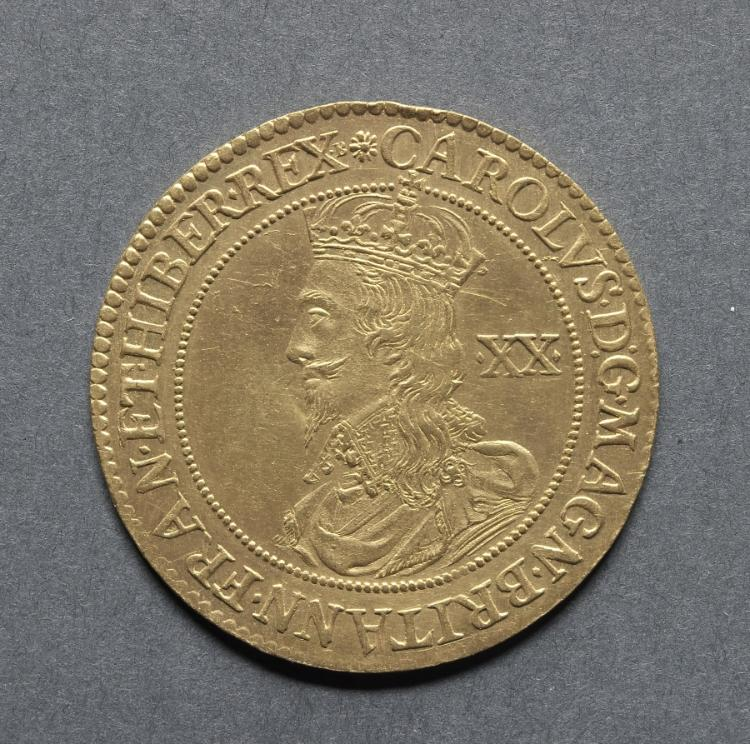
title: Unite: Charles I (obverse)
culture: England, Charles I, 1625-1649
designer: Nicholas Briot (French, c. 1579–1646)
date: 1631–32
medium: gold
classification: Coins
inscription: CAROLVS∙D:G∙MAGN∙BRITANN∙FRAN∙ET∙HIBER∙REX, XX